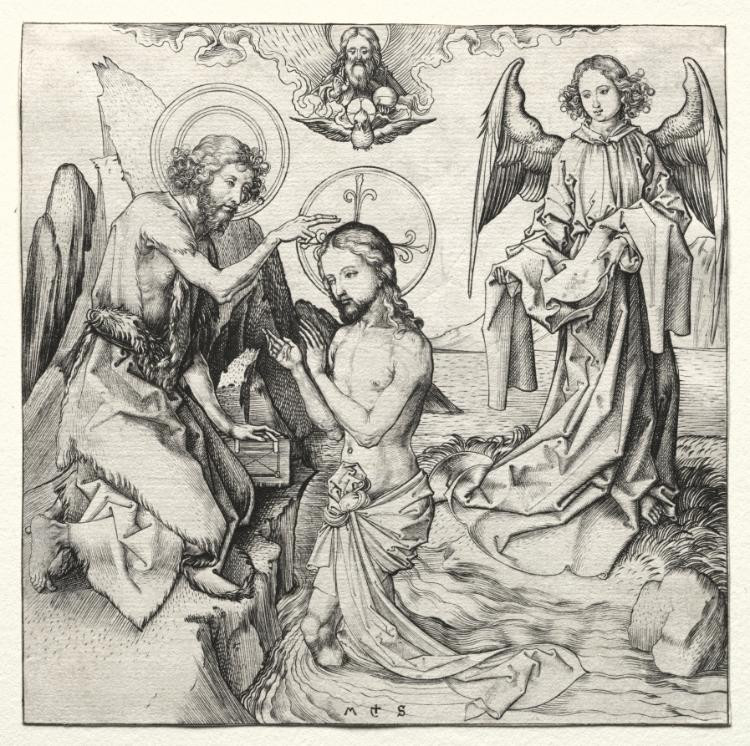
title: The Baptism of Christ in the Jordan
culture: Germany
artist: Martin Schongauer (German, c. 1450–1491)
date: c. 1480–90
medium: engraving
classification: Print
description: Christ wades in the Jordan River to be blessed by John the Baptist, whose left hand rests on a book of scripture, signifying the fulfillment of prophecy. Overhead, the Spirit of God approvingly descends in the form of a dove. Schongauer’s engraved lines inventively emulate different natural qualities and textures, for example the fur of John’s robe, the figures’ spiraling locks of hair, and the stippled wings of the angel.